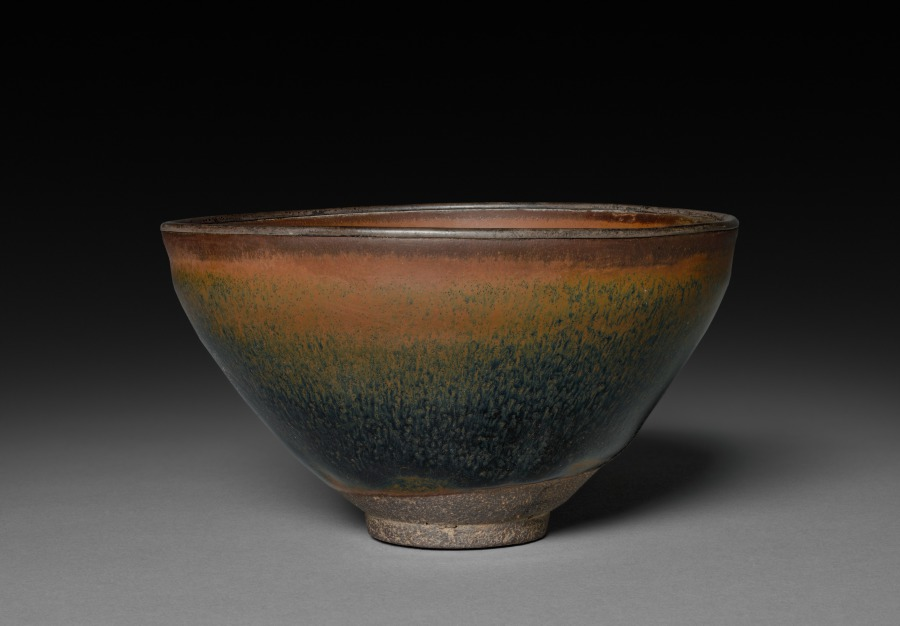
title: Tea Bowl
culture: China, Fujian province, Song dynasty (960-1279)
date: 960–1279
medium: purplish brown stoneware with iron slip glaze coating, Jian ware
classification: Ceramic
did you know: Jian ware was very popular with the tea cultures in China and Japan.